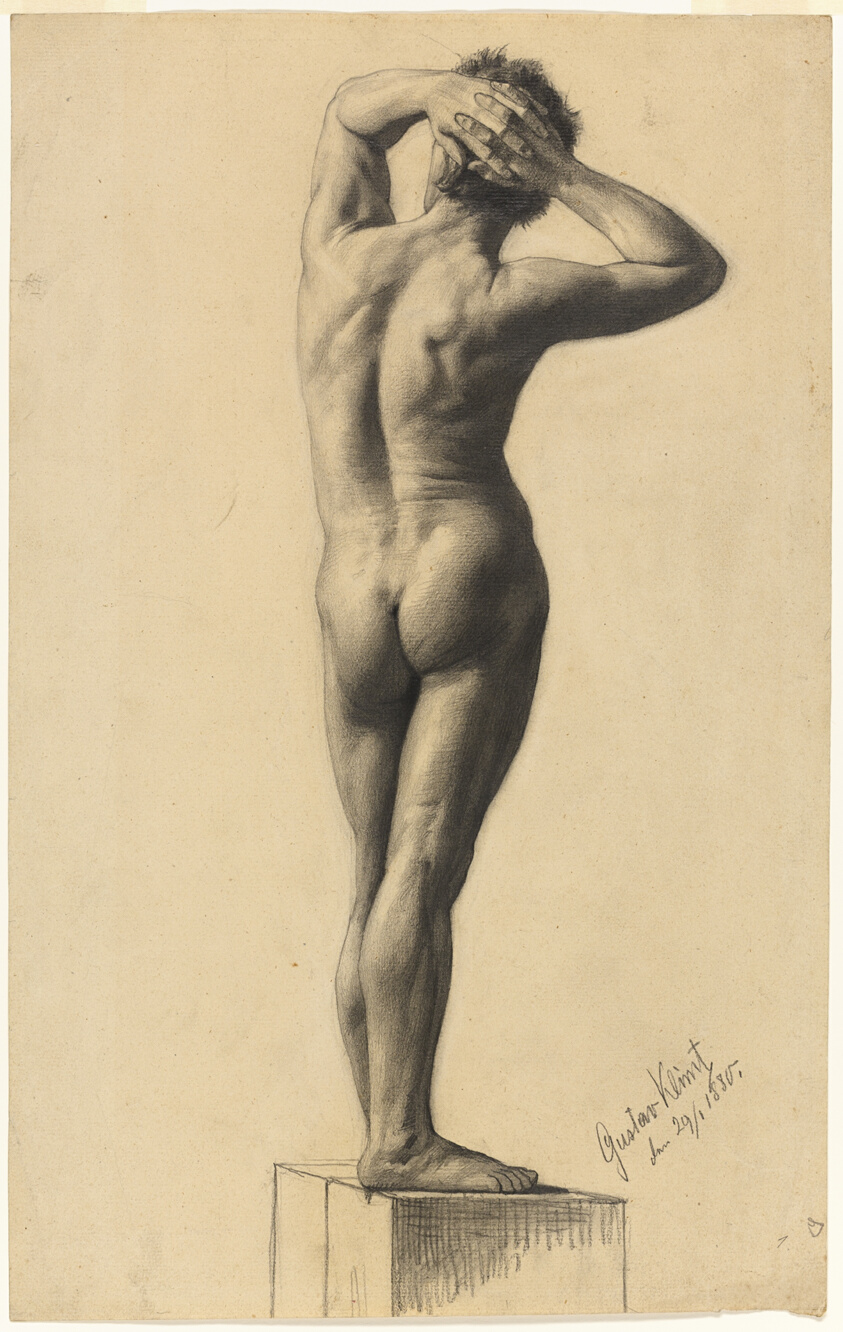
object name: Drawing and Watercolor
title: Male Nude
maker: Gustav Klimt (Austrian, 1862–1918)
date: January 29, 1880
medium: Various graphite pencils, with erasing and stumping, on cream laid paper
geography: Austria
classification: prints and drawing; graphite; drawings (visual works)